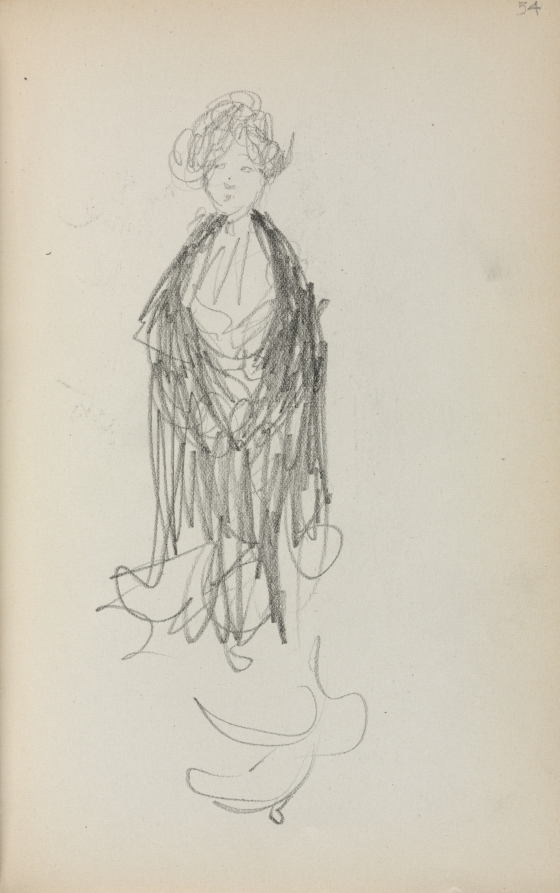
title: Italian Sketchbook: Standing Woman with Shawl (page 54)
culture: America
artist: Maurice Prendergast (American, born Newfoundland [now Canada], 1858–1924)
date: 1898–1899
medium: pencil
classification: Bound Volume